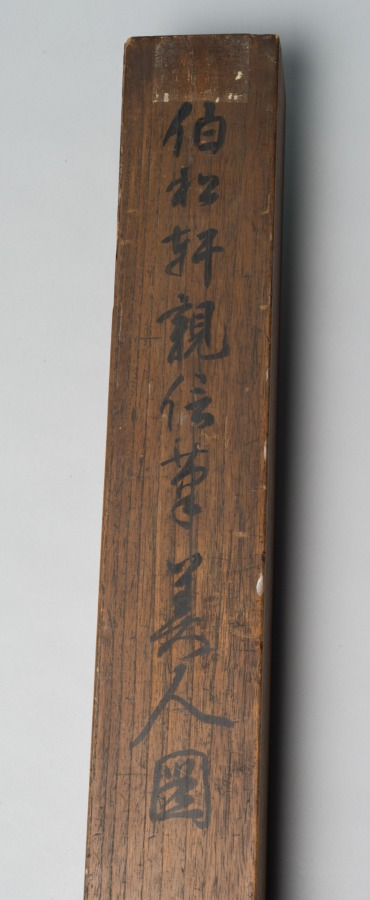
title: Courtesan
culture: Japan, Edo period (1615–1868)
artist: Matsuno Chikanobu (Japanese, active 1716–35)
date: 1716–35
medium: hanging scroll; ink and color on paper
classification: Painting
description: A glamorous courtesan sports an outer robe decorated with large roundels featuring plant motifs including iris and bush clover. Little is known about the life and artistic training of the painter Matsuno Chikanobu, an ukiyo-e artist who painted in a style strongly reminiscent of that of the Kaigetsudō studio. Many of his known paintings are on silk, and executed with high quality pigments, indicating that his primary clientele were wealthy individuals.